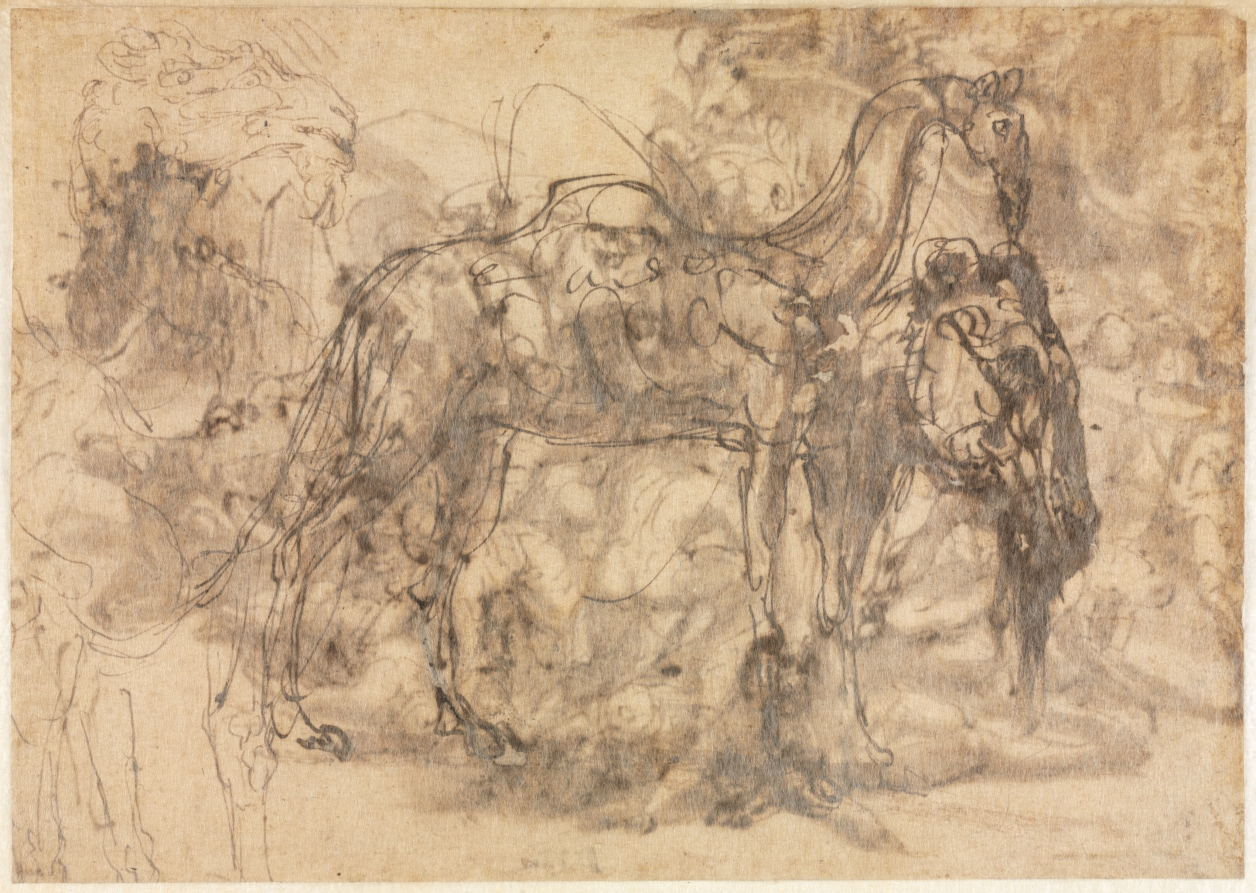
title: Sketches of Animals (verso)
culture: Italy, 16th century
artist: Perino del Vaga (Italian, 1501–1547)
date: c. 1545/47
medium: pen and brown ink (iron gall) and brush and brown wash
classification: Drawing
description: Perino del Vaga made this spirited pen and ink and wash drawing as a preliminary sketch for a fresco cycle depicting the military campaigns of Alexander the Great, intended for the apartments of Pope Paul III in the Castel Sant’Angelo in Rome. At the time, he was also working on commissions at the Vatican Palace where he studied and drew from the frescoes of Michelangelo in the Sistine Chapel. One pose in the drawing, that of the man in front who, sword poised over his head, prepares to strike a man below, was probably inspired by Michelangelo’s rendering of David and Goliath on the ceiling. Perino adapted the violent pose for a military rather than biblical subject, filling out the scene with trumpeting elephants and a pile of soldiers in combat. On the verso of the sheet, Perino drew a quick sketch of a standing camel and another, closer view of the animal's head and legs.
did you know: This artist was in Rome in 1527 when the troops of Charles V sacked the city, and was imprisoned and forced to pay a heavy ransom for his, his wife's, and his daughter's safe release.